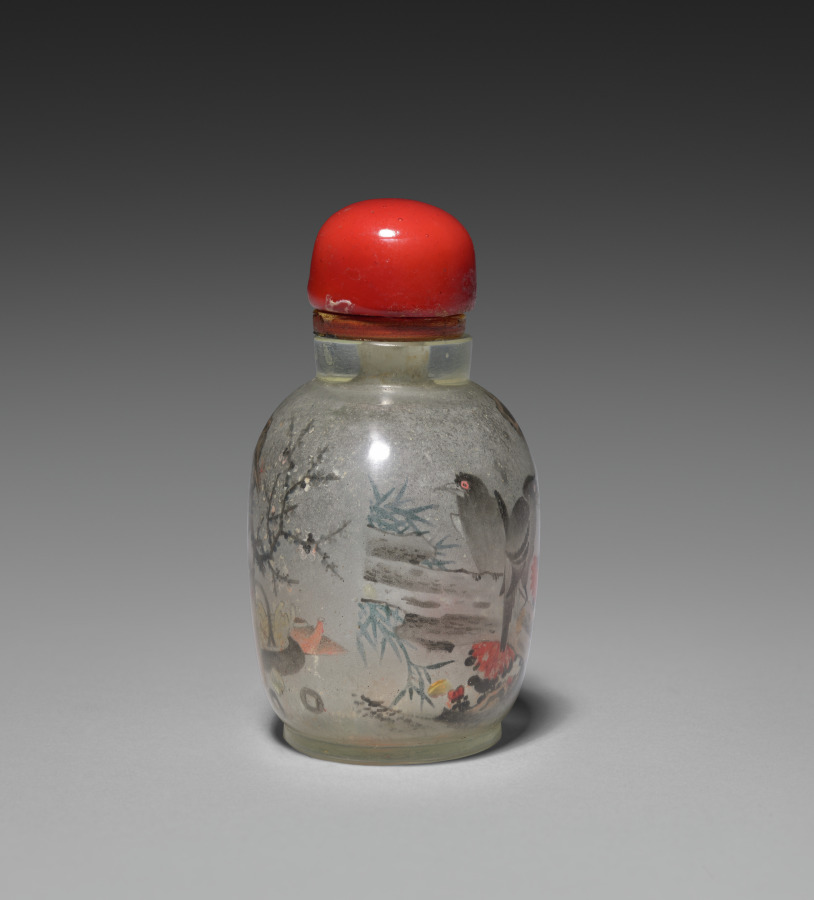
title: Snuff Bottle with Stopper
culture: China, Qing dynasty (1644–1911), Qianlong reign (1736–95)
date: 1736–95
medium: crystal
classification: Stone